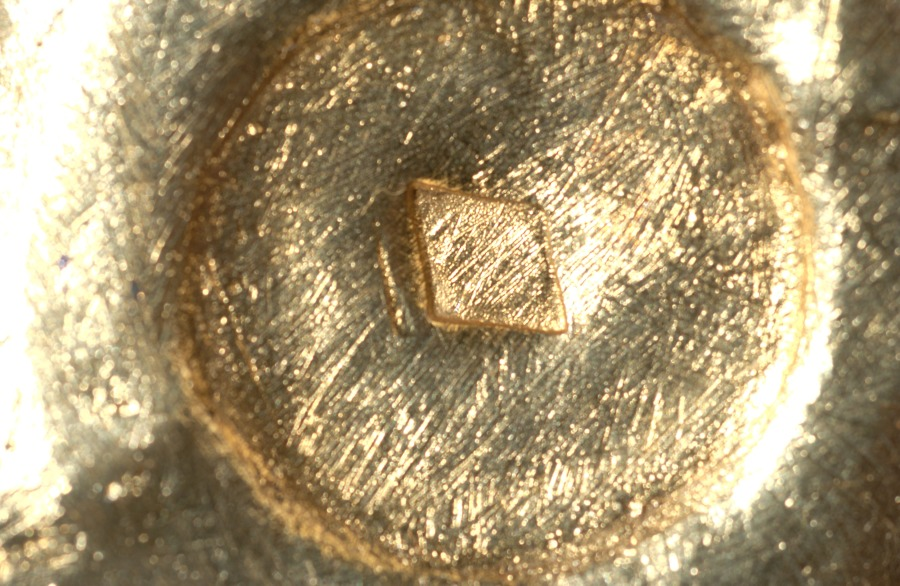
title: Centerpiece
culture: France, 19th century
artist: Charles-Nicolas Odiot (French, 1826–1868)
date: 1838–1848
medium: silver gilt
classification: Metalwork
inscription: engraved inside base: "ODIOT ORFEVRE DU ROI A PARIS"; engraved beneath crowns: "LP" (conjoined for King Louis Philippe of France).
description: Made for Louis Philippe (1773-1850), King of France 1830-48.